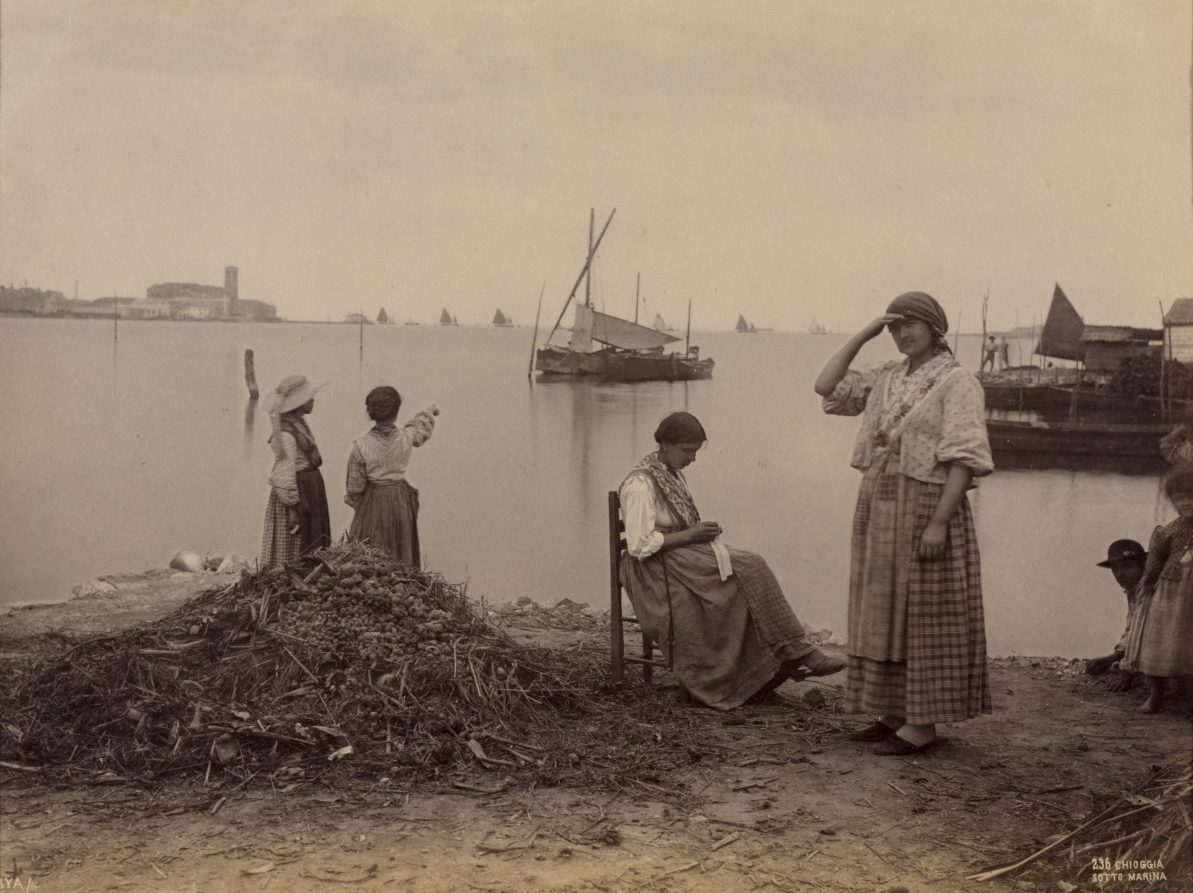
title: Chioggia, Under the Marina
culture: Italy, 19th century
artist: Carlo Naya (Italian, 1816–1882)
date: c. 1870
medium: albumen print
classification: Photograph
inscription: Written in negative: "C. Naya, fot / 236 Chioggia / Sotto Marina"